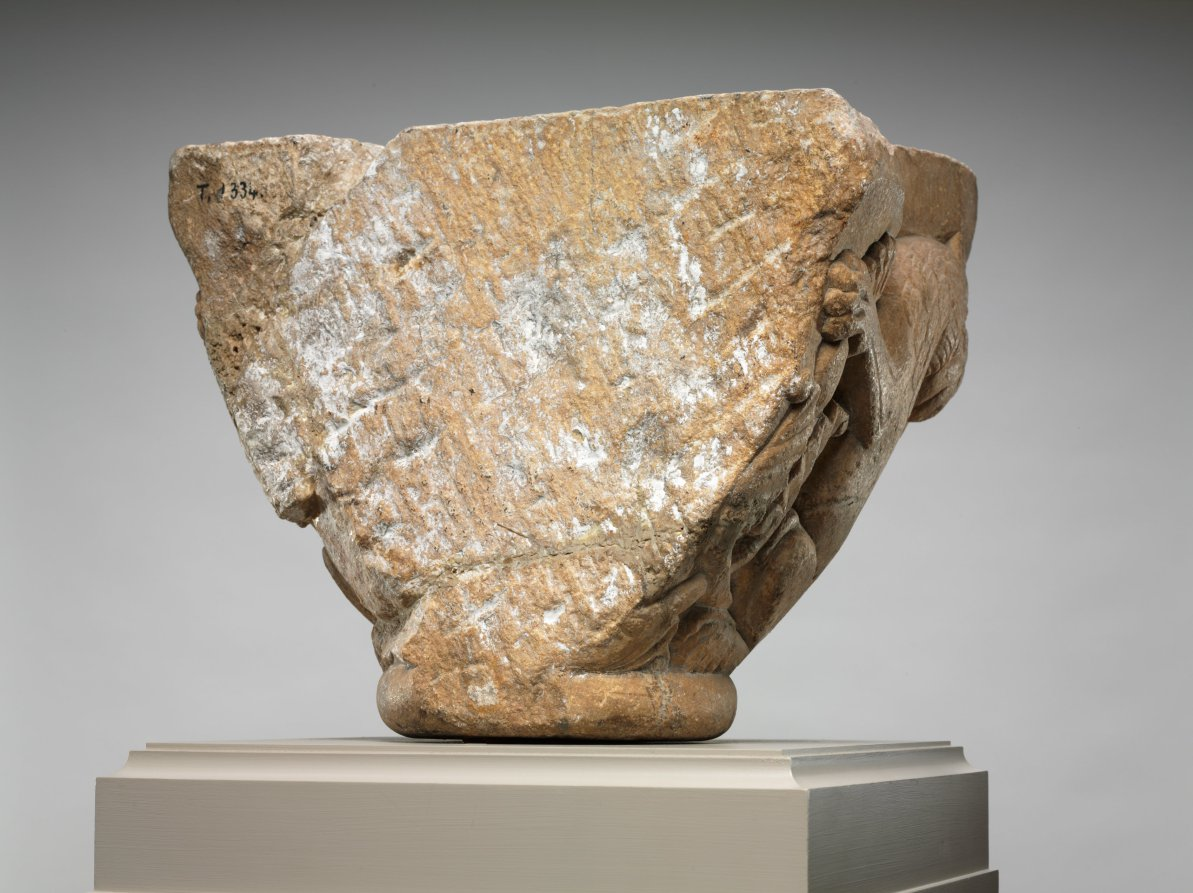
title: Engaged Capital with Lions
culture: Northern Spain (Navarre ?) or Southwest France (Pyrénées or Roussillon ?), mid-12th century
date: 1145–64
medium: marble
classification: Sculpture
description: The compositional motif of confronted and addorsed beasts illustrated on this capital was especially popular in churches along the pilgrimage roads.